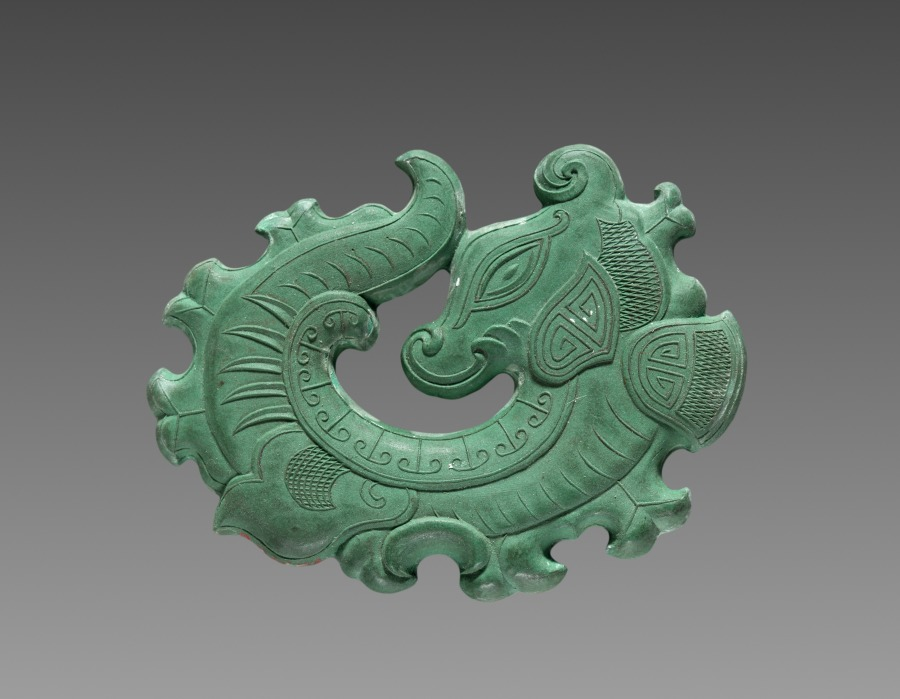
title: Box with Ink Cakes: Green Ink Cake in Shape of Coiled Dragon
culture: China, Qing dynasty (1644-1911), Jiaqing reign (1795-1820)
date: 1795–1820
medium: Molded ink in green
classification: Miscellaneous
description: Ink cakes (also called ink sticks) are dissolved with the addition of water and then ground on the surface of a flat square stone into liquid ink for painting and calligraphy. The precious ink cakes here, however, have never been used. The inscription on the side of the blue ink cake says that the set was commissioned by Chen Huai, Governor of Jiangxi Province.